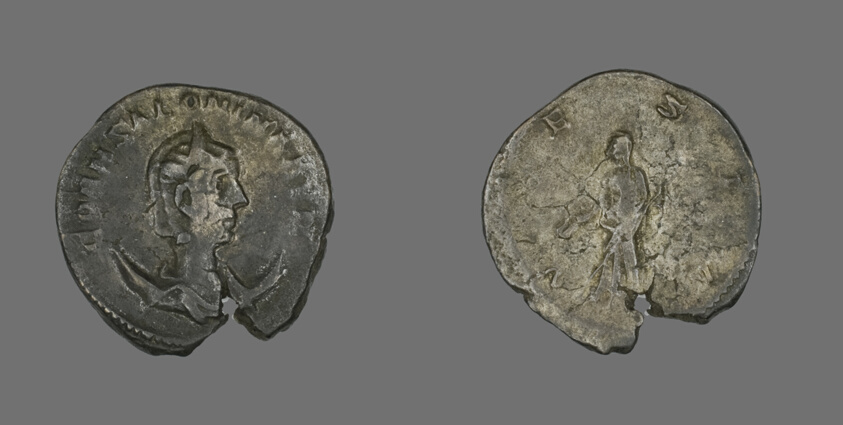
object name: Coin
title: Antoninianus (Coin) Portraying Empress Salonina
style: roman (ancient, style or period), ancient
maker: Roman; minted in Rome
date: 253-260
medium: Billon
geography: Roman Empire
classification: coin; ancient art